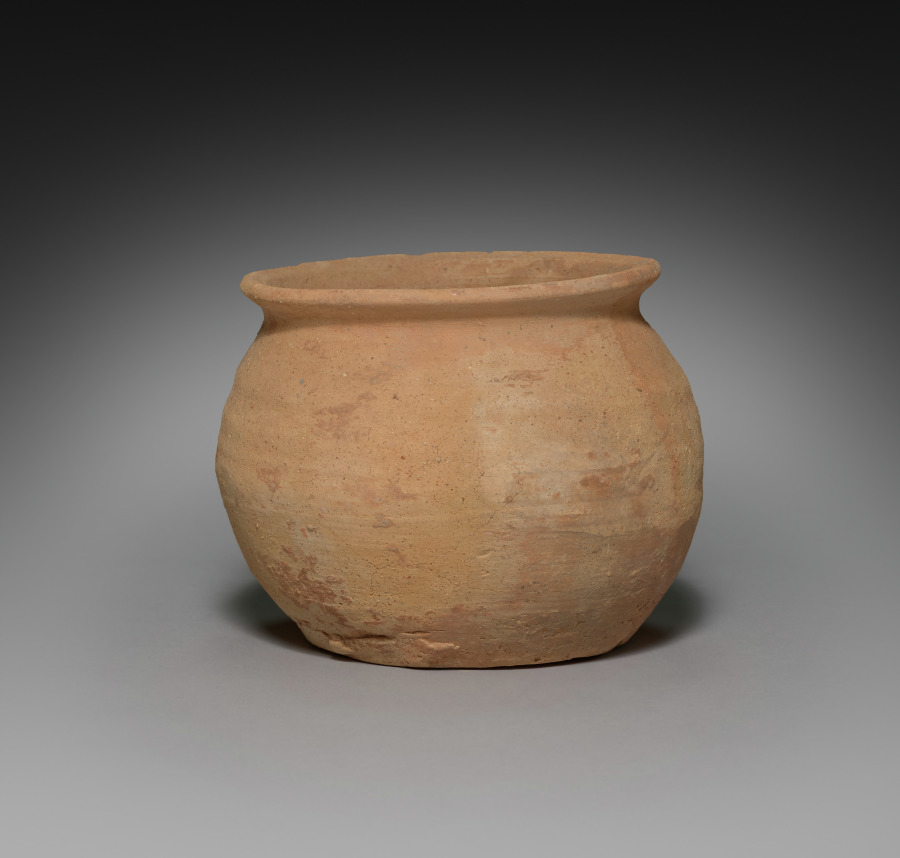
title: Covered Jar with Horn Handle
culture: Korea, Silla (57 BC-935) or Kaya (AD 42-562) period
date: 400s–500s CE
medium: red earthenware with applied red slip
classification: Ceramic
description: Early earthenware from the Three Kingdoms period (57 BCE–668) became widely utilized as agriculture and religion grew to be essential elements in sustaining society and its systems. The clay jars of different sizes and shapes on display were made for the following purposes: some were used to store harvested grains and seeds, some, especially lidded ones such as this example, to preserve cremated remains, and some to serve offerings in rituals.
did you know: Closed kilns built on hillsides became widely used for producing this type of pottery vessel in Korea during the Three Kingdoms period.